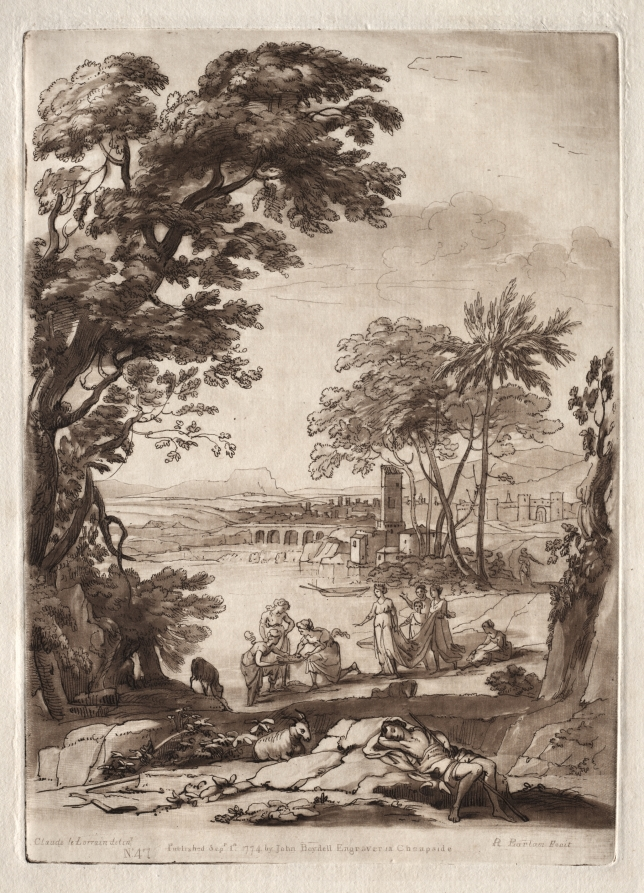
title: Liber Veritatis: No. 47, A River Scene with the Finding of Moses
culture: England, 18th century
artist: Richard Earlom (British, 1743–1822)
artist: after Claude Lorrain (French, 1604–1682)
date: 1774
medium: etching and mezzotint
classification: Print